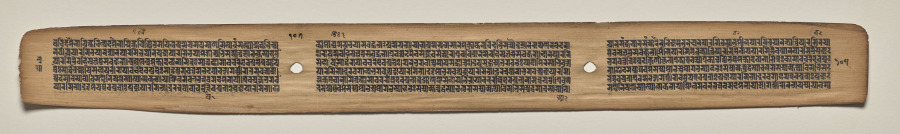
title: Text, Folio 107 (verso), from a Manuscript of the Perfection of Wisdom in Eight Thousand Lines (Ashtasahasrika Prajnaparamita-sutra)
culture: Eastern India, Bihar, Vikramashila Monastery. Painting: Nepal, Kathmandu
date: Sunday, September 14, 1119 (year 239 of the Newar Samvat in the month of Ashvina)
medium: gum tempera and ink on palm leaves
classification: Painting